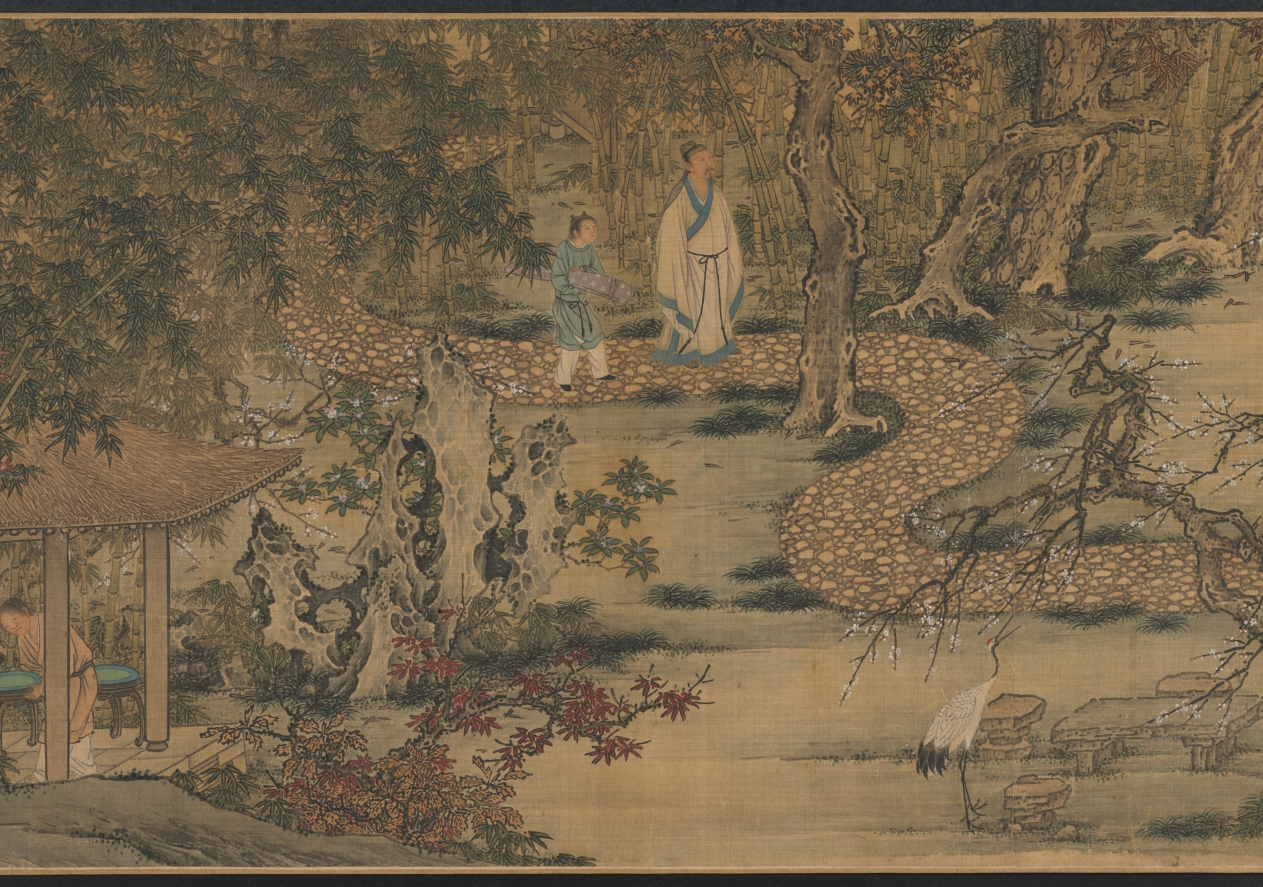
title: The Nine Elders of the Mountain of Fragrance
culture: China, Ming dynasty (1368–1644)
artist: attributed to Xie Huan (Chinese, c. 1370-c.1450)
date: 1426–52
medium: handscroll, ink and color on silk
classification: Painting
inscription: 4 seals: 2 of Xiang Yuanbian 項元汴 (1525–1590); 1 of the Qianlong Emperor (r. 1736-95); 1 of C. C. Wang 王季遷 (1907–2003)